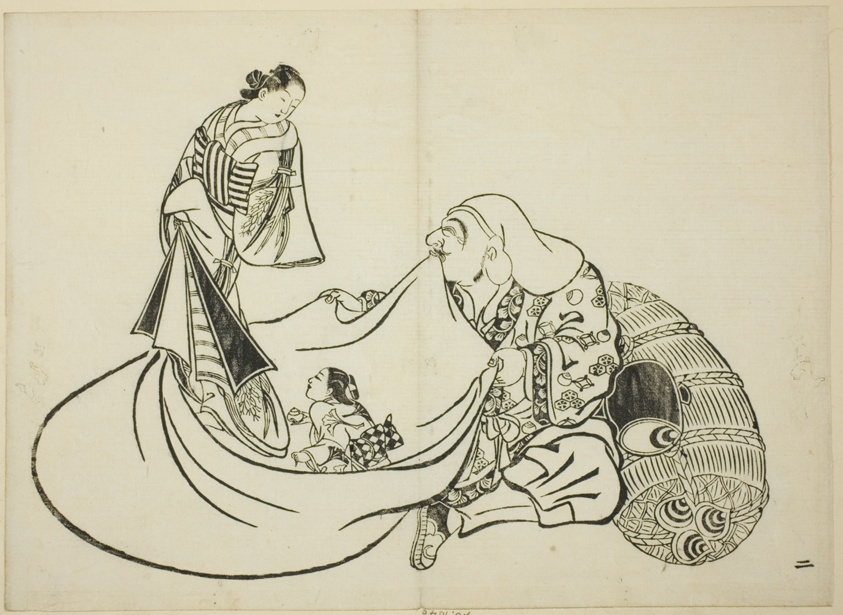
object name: Print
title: Daikoku revealing the contents of Hotei's bag, no. 2 from the series of 12 prints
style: Japanese (culture or style)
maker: Okumura Masanobu (Japanese, 1686-1764)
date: c. 1708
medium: Woodblock print; oban, sumizuri-e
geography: Japan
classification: woodblock print; print; asian art; woodblock